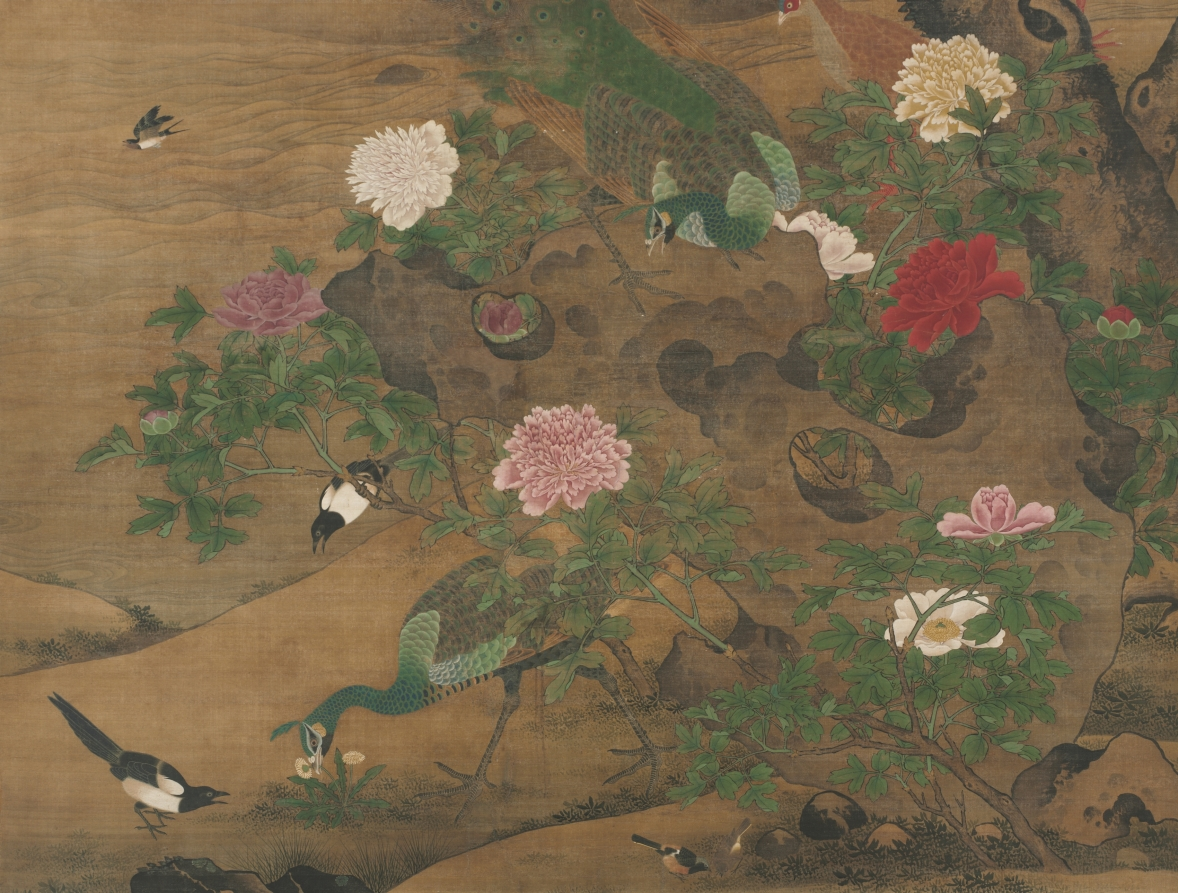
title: Birds Gather under the Spring Willow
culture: China, Ming dynasty (1368–1644)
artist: Yin Hong (Chinese, c. 1430-c. 1500)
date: late 1400s-early 1500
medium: hanging scroll, ink and color on silk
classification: Painting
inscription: 殷宏. [印]金臺世家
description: This scroll depicts a spring scene with all kinds of birds, including one peacock with a hen among peonies. The painting is one of four surviving works by Yin Hong bearing his signature and seals. Some scholars debate whether this work depicts the theme “One Hundred Birds admiring the Phoenix,” a metaphor for human society presenting an idealized hierarchy under imperial rule; other scholars argue that peafowls, as exotic birds not native to China, would not be depicted to represent the emperor. This large painting might have been hung in a palace hall and may have been part of a set depicting the four seasons.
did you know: The peahen is plucking a dandelion.